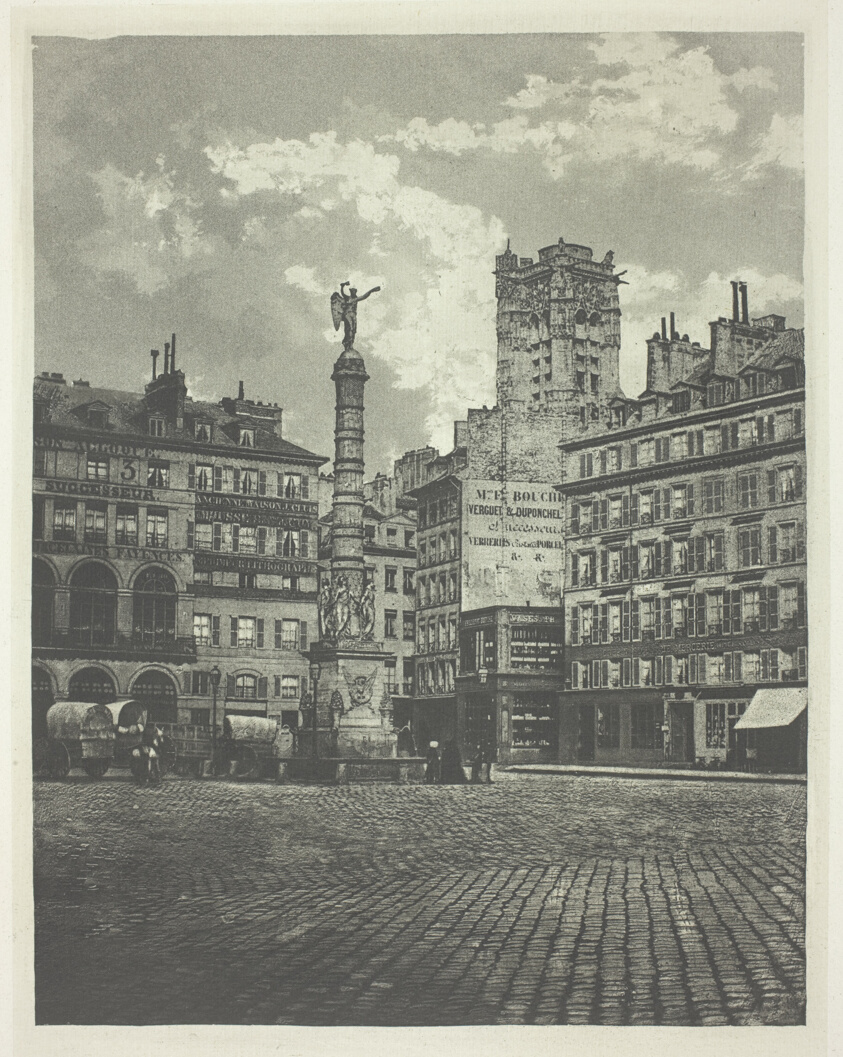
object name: Photograph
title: Paris, Place de Châtelet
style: 19th century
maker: Charles Nègre (French, 1820–1880)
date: 1854/55, printed 1982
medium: Photogravure, from the portfolio Charles Negre: Treize Heliogravures, 1854–1857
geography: France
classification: photogravure; photomechanical process; photography; photograph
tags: Paris